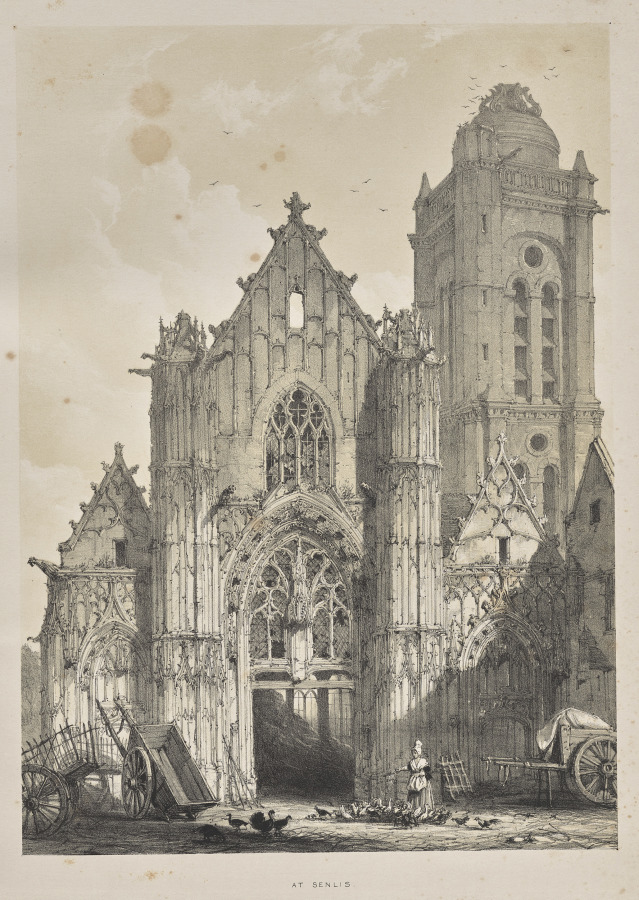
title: Architecture of the Middle Ages: At Senlis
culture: England, 19th century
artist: Joseph Nash (British, 1808–1878)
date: 1838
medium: lithograph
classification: Print